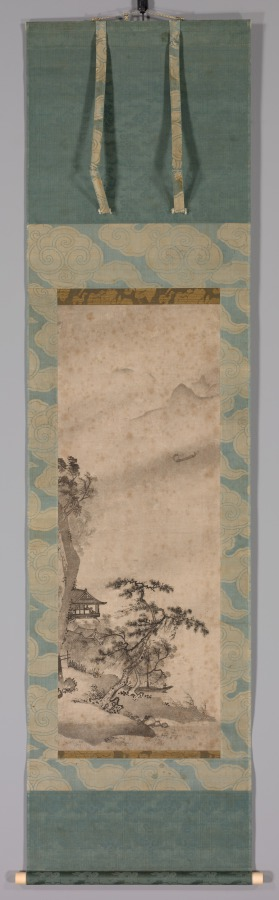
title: Windy Landscape with Sailboat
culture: Japan, Muromachi period (1392–1573)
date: mid-1400s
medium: hanging scroll; ink on paper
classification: Painting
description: Windy Landscape depicts the humble waterside retreat of an official retired from government service. For government officials, retreating from the city to a remote locale was the ideal retirement, though difficult to attain. In this scroll the retiree gazes out over the watery expanse past the sailboat to the mist-covered mountain in the far distance. The artist has achieved this depth of composition through carefully placed brushstrokes and ink washes.